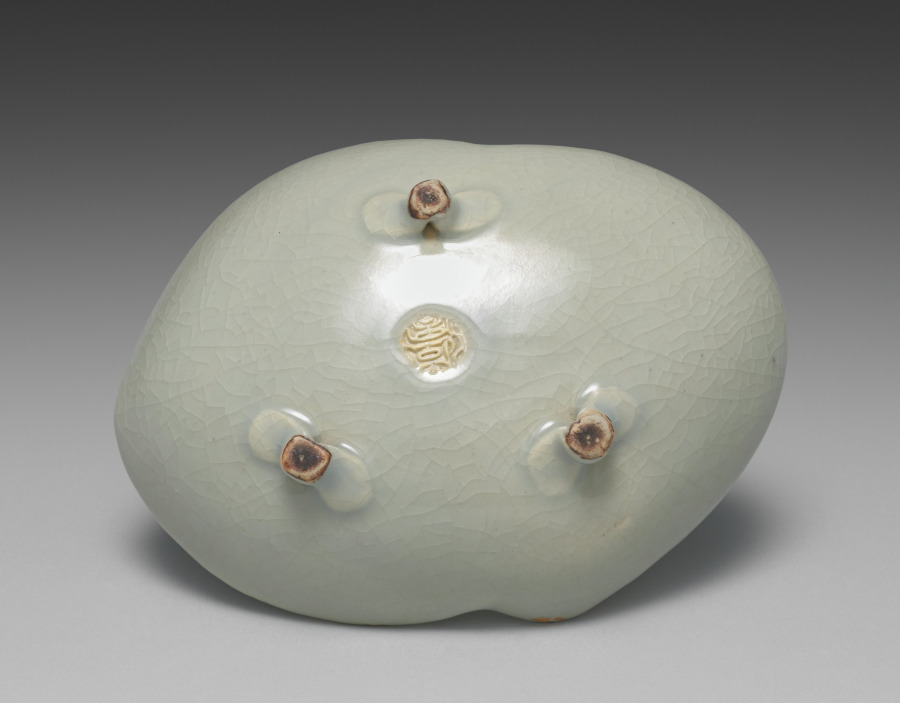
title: Dish from Dishes with Matching Shells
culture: Japan, Meiji period (1868–1912)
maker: Seifū Yohei III (Japanese, 1851–1914)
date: 1893–1914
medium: One of a pair of dishes; porcelain with celadon glaze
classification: Ceramic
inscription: 清風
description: Yohei III’s main output for his sophisticated clientele was in the form of tea sets and dining sets. He created a range of dishes in green glazes. He often produced in pairs, sets of five, or sets of ten. This pair of shell dishes have a box lid interior attestation by Yohei IV that the dishes were made by Yohei III with a cracked-ice (hyōretsu) pattern in the glaze, omitting reference to any glaze coloration.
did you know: These shell-shaped dishes are of the saucer type, suitable for dipping sauces.